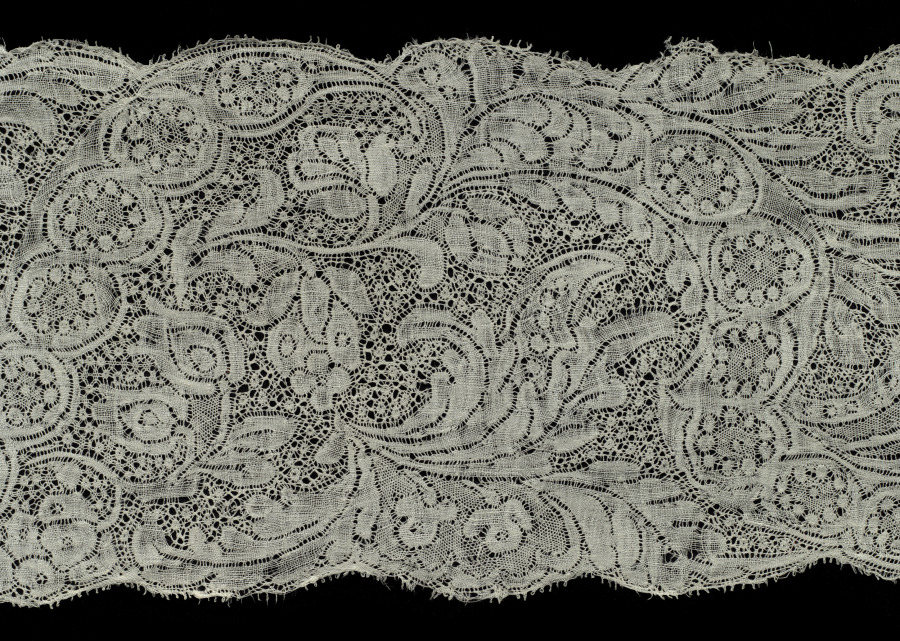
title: Lace Lappet (one of a pair)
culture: Belgium, Binche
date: 1700s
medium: Linen: bobbin lace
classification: Lace